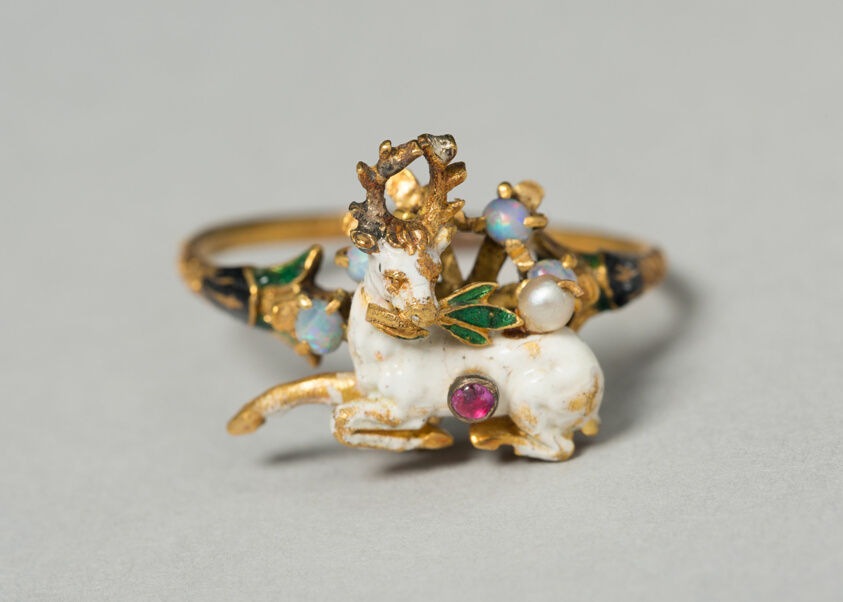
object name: Costume and Accessories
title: Stag with Herb Branch Mounted as a Ring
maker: German or French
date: c. 1550-c. 1600 (stag), mounted on later ring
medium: Gold, enamel, ruby, opals, and pearls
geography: Germany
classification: jewelry; european decorative arts; costume